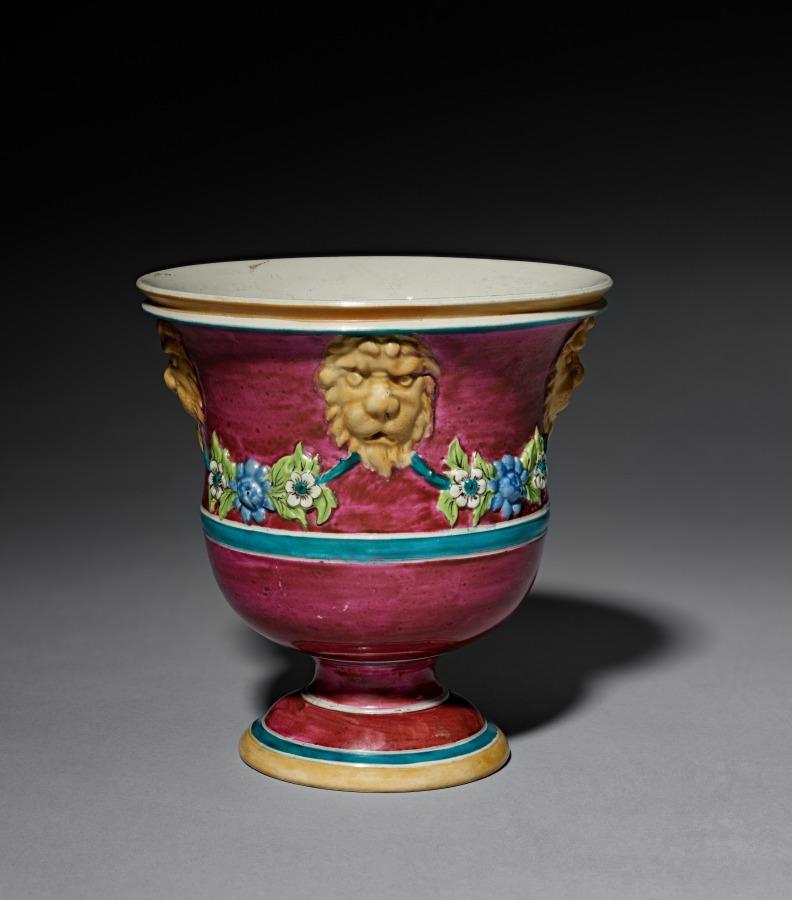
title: Jardinière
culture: England, Staffordshire, 18th century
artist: Staffordshire Factory (British)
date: c. 1760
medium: salt-glaze earthenware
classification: Ceramic